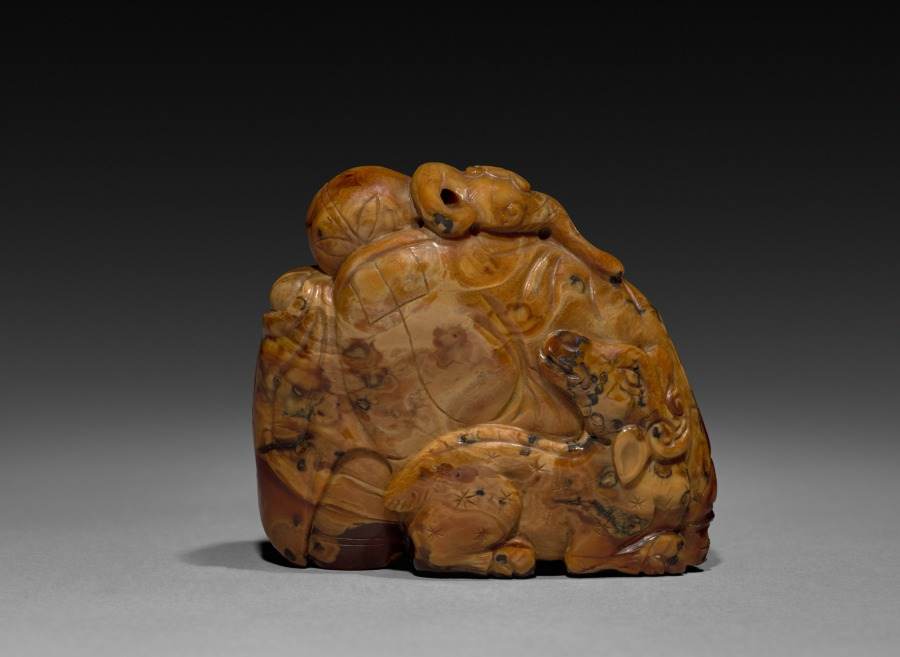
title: Li Taibo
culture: China, Qing dynasty (1644-1911)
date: 1700s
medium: amber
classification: Stone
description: This piece of ochre amber is carved in the round in the form of Li Bai 李白 (701–762), also known as Li Taibai or Li Taibo, 李太白. He was a poet in the golden age of Chinese poetry. Around a thousand poems are attributed to him. Li’s eyes are closed, an arm wrapped around his wine jar, in a drunken sleep. Perched on his shoulder is a bat, considered a lucky symbol as the Chinese word for bat, 蝠 fú, is pronounced the same as “good fortune” 福. Deer, like the one nestled behind Li, traditionally symbolize longevity and prosperity. These auspicious symbols create a bittersweet contrast with the legendary story that Li drowned while drunk when reaching to grasp the moon's reflection in the river.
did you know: Li Bai was one of the Eight Immortals of the Wine Cup, Tang dynasty scholars who enjoyed drinking alcohol.